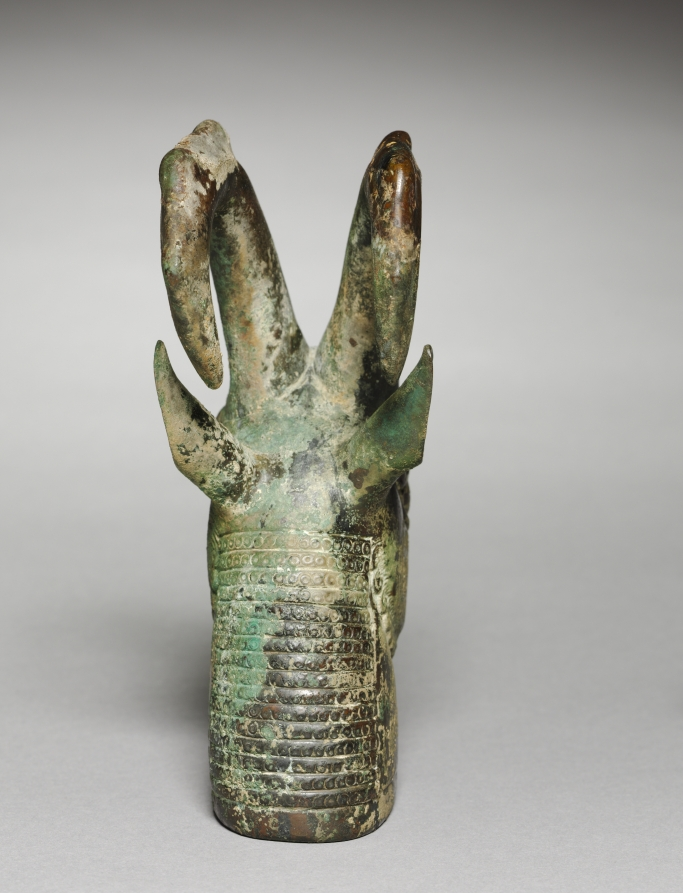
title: Ibex-Head Ornament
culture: Iran, Achaemenid (550–330 BCE)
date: c. 525–450 BCE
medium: bronze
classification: Sculpture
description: This may have decorated an ornate piece of furniture or a huge and heavily embellished bronze cauldron similar to that which the nearby bronze bull head once adorned.